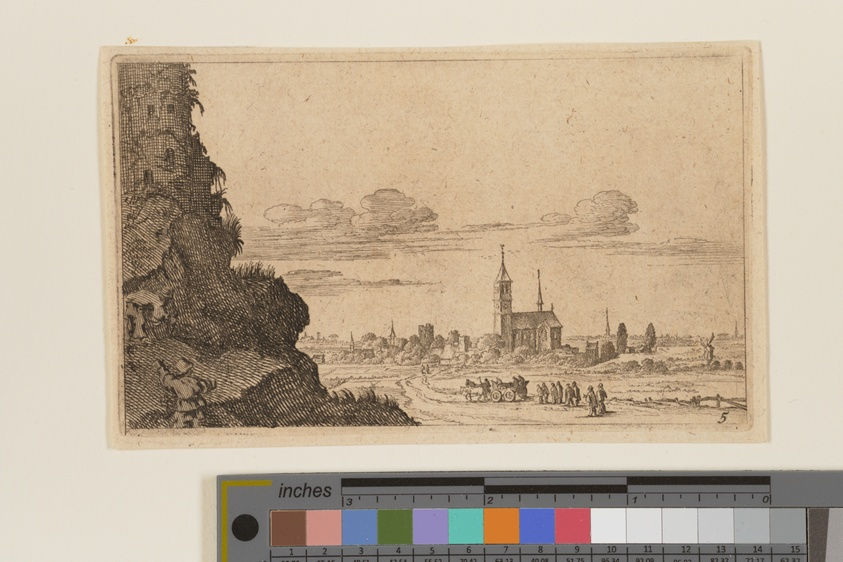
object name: Print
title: Two Men Climbing Rocks up to Ruins, from Twelve Landscapes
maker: Gillis van Scheyndel (Dutch, 1595–1660)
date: c. 1605-1650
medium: Etching on ivory laid paper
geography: Netherlands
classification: etching; paper; print; prints and drawing